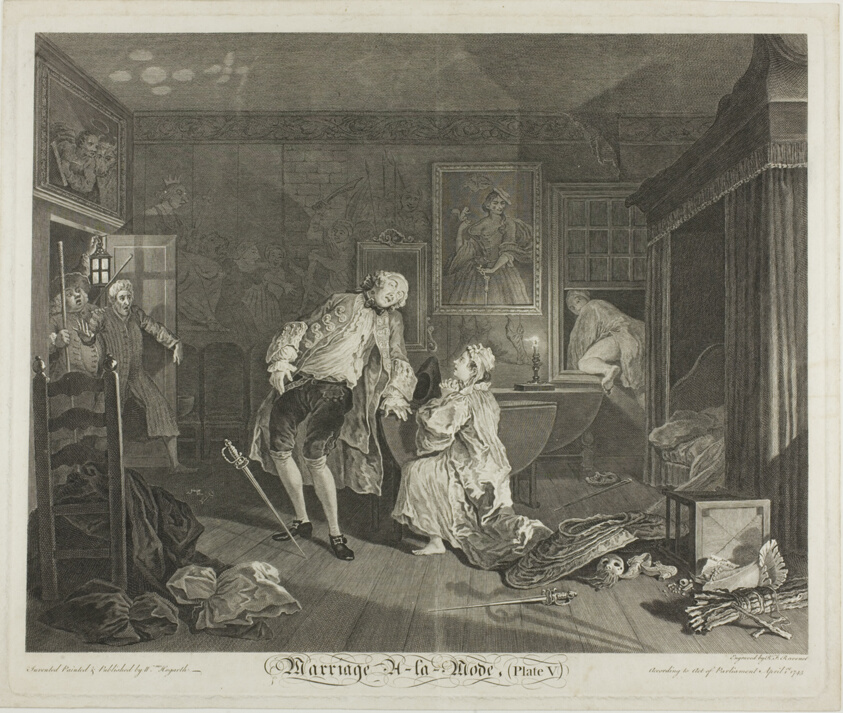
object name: Print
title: Plate Five, from Marriage à la Mode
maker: Simon Francis Ravenet (French, 1706-1774); after William Hogarth (English, 1697-1764)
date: 1745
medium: Etching and engraving in black on ivory laid paper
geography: France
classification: etching; paper; print; prints and drawing